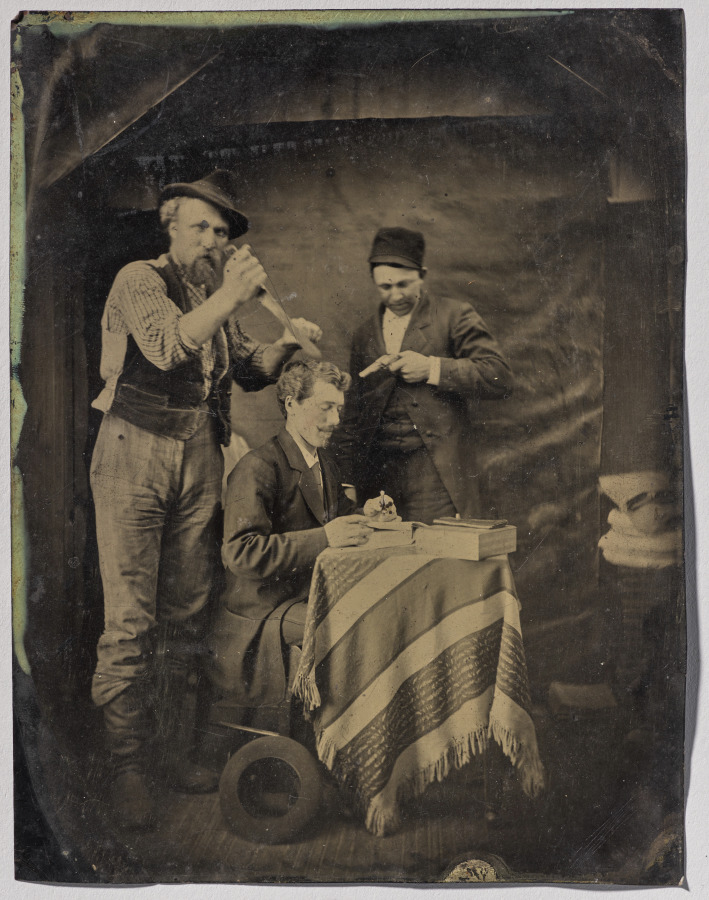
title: The Hold-Up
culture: American, 19th century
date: 1880s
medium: tintype, whole plate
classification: Photograph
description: Since the beginning of photography, objects and people have been purposefully arranged, or staged, for the camera. Popular in the late 1860s and 1870s, tintypes offered low prices and shortened exposure times. Perhaps because tintypists commonly worked at fairs and carnivals, frivolous images, such as this staged hold-up, became common. In these fictional scenes, all the participants were in on the joke. Some such scenes may be novelties, others may be gag portraits commissioned by groups of friends.